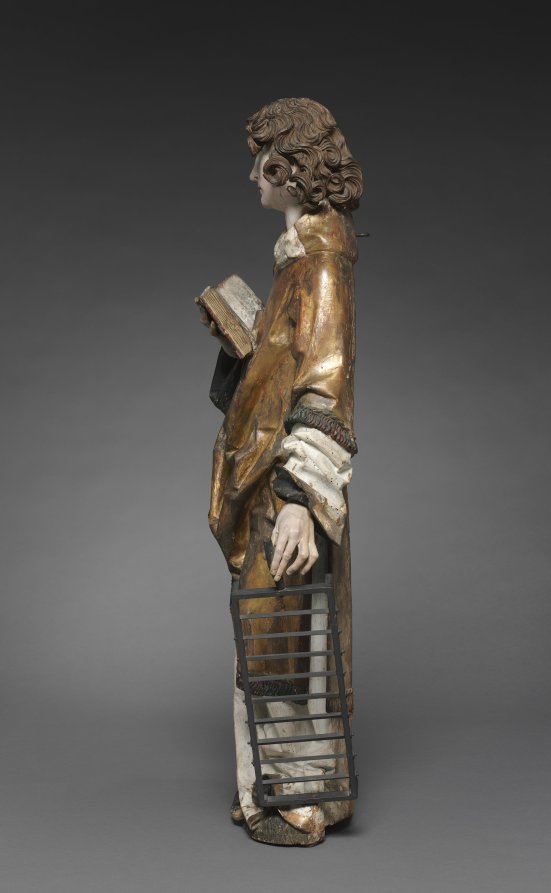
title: Saint Lawrence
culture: Germany, Würzburg, 16th century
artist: Tilman Riemenschneider (German, active Würzburg, c. 1460–1531)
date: 1502–8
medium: lindenwood with polychromy and gilding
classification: Sculpture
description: This sculpture, along with that of Saint Stephen (1959.43), and two female saints preserved in Frankfurt (Historisches Museum), are believed to be the remaining fragments of a large altarpiece carved by Riemenschneider for the Dominican convent in Rothenburg in Franconia (demolished in 1813). Saints Stephen and Lawrence both wear the dalmatic to indicate their status as deacons in the early church. Each holds a symbol of his martyrdom; here, Saint Lawrence holds a grill to indicate his death by burning. Late Gothic Style Art in Germany through the early 1500s remained firmly anchored in the late Gothic style with its associated interests in realism. Riemenschneider was one of the most prolific and versatile sculptors of this style, a recognized master in both stone and wood. His flourishing workshop employed as many as 40 apprentices in sculpting, woodcarving, and painting. His sculptures are noted for the dreamy, melancholy, and introspective quality in their expressions, as well as their remarkable attention to detail.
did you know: Before Riemenschneider finally settled in Würzburg, Germany, in 1484, he traveled to Strasbourg and Colmar, where he became acquainted with the works of the engraver Martin Schongauer.